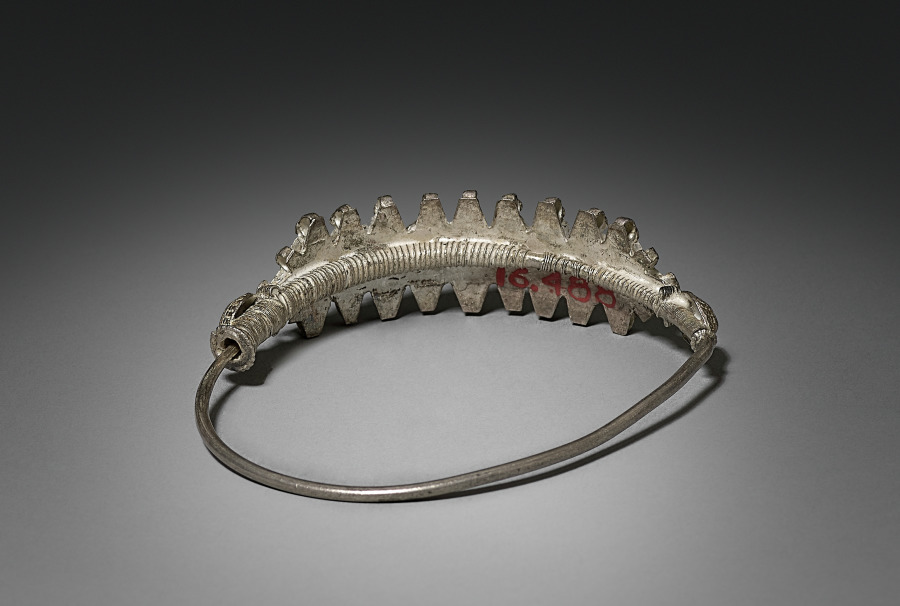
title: Nose Ring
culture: India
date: early 1900s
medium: silver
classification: Jewelry